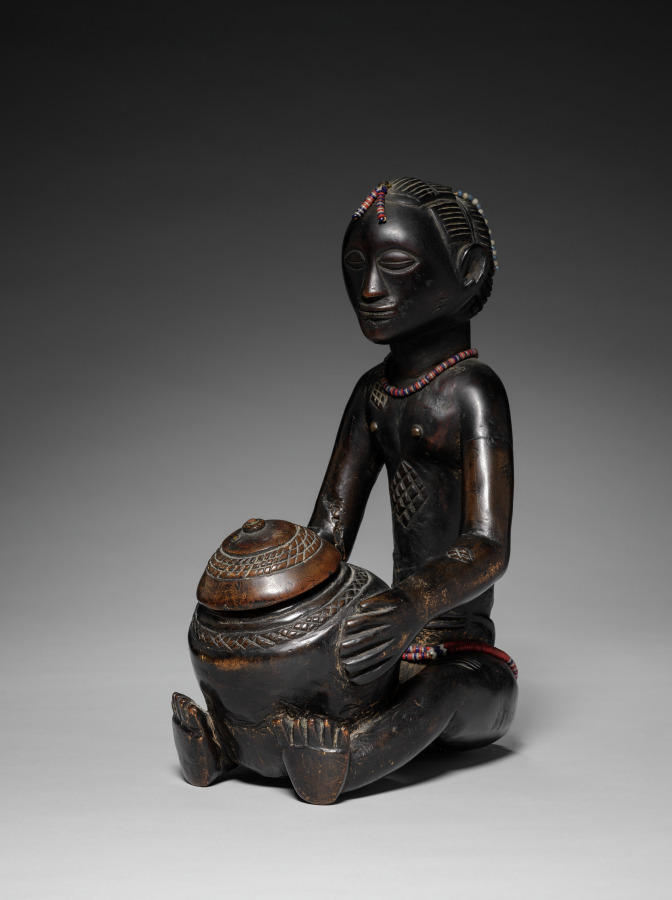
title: Female Bowl-Bearing Figure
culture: Africa, Central Africa, Democratic Republic of Congo, Luba-style carver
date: late 1800s-early 1900s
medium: Wood, glass beads, upholstery studs, plant fiber, and iron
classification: Sculpture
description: In Luba-style art, an object's beauty affects how well it works. While bowl-bearing figures had many possible uses, a royal diviner likely used this well-carved image of a woman carrying a bowl in rituals. Dusty traces of mpemba (white chalk) fleck the shining exterior and the bowl's interior, showing it once held this sacred powder. Diamond-shaped scarification marks at her waist, chest, and back add to her beauty. Her hair is carved into the cascading layered hairstyle worn in the Luba region at the turn of the twentieth century. Strands of imported glass beads encircle her waist and neck, and dangle from her hair. The alternating white and blue beads may symbolize the moon and Mbidi Kiluwe, a culture hero linked to royal practice and smithing. While much Luba-style art depicts women—who are societally important—men created and owned the majority of such works.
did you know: Symbolic of anvils, the round metal tacks decorating the figure's hair "pin" spirits and their secrets within it. They are at the hairline and each of the four hair cascades (the bottommost is now gone).